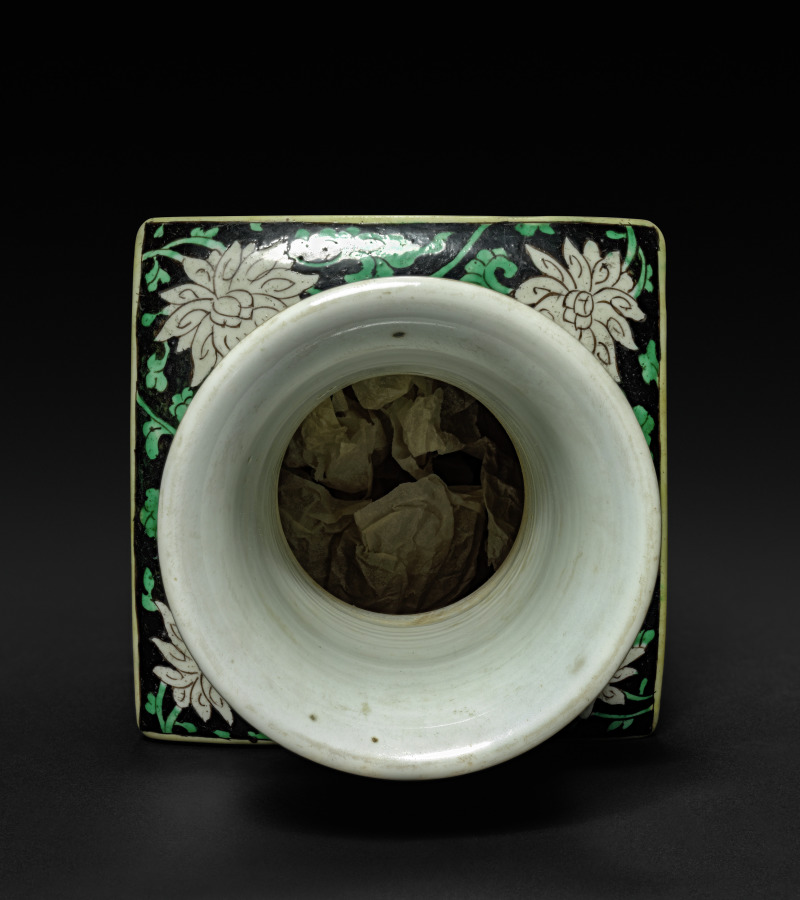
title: Club-shaped Vase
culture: China, Qing dynasty (1644-1911), Kangxi reign (1662-1722)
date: 1662–1722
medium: porcelain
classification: Ceramic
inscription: 大明成...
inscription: [arrow] FRONT/Stand #114